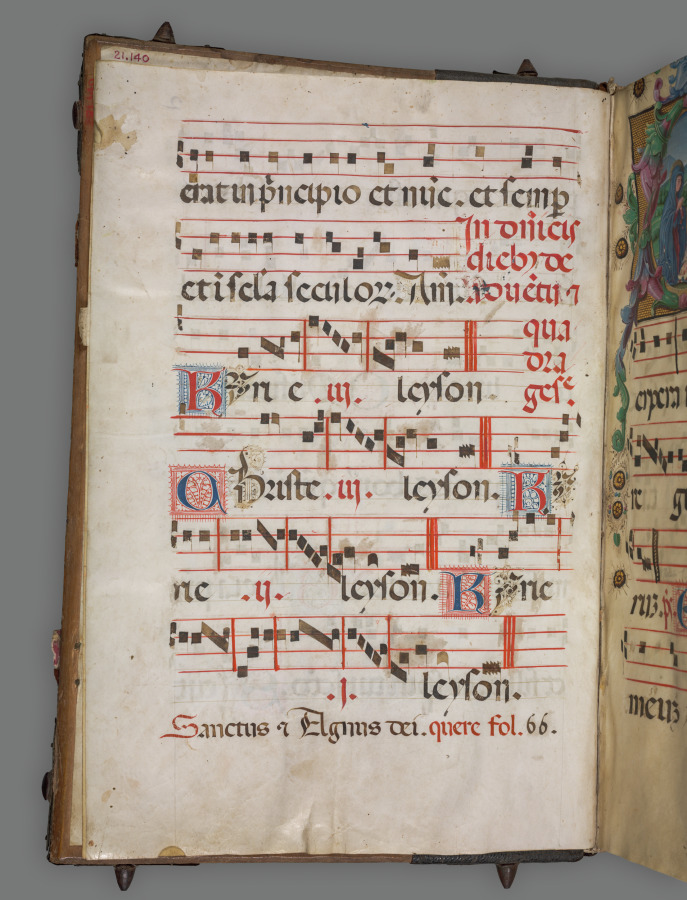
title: Gradual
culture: Italy, Verona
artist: circle of Girolamo dai Libri (Italian, 1474–1555)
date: c. 1520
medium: ink, tempera, and gold on parchment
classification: Manuscript